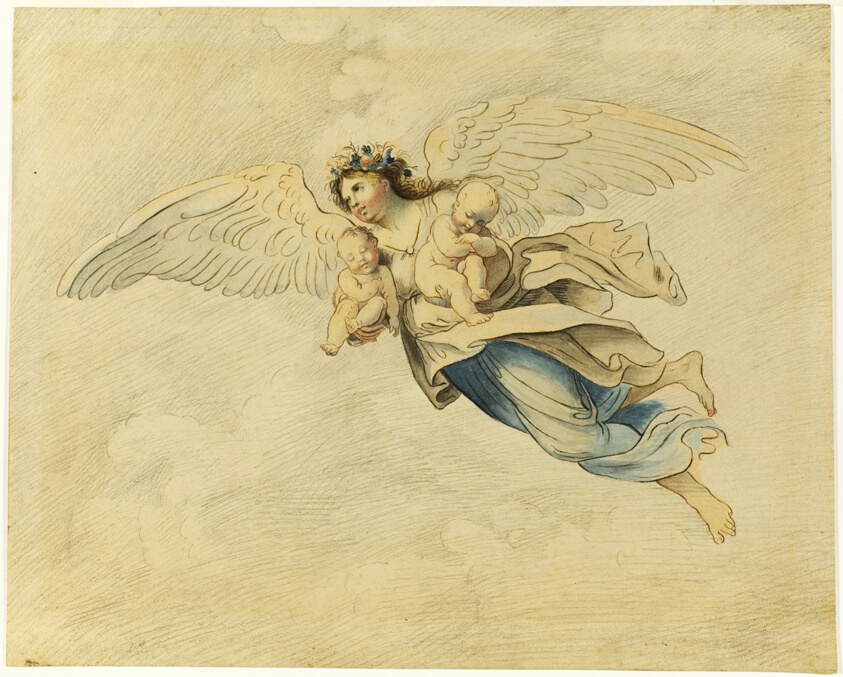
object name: Drawing and Watercolor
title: Night Carrying Sleep and Death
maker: after Domenichino; Italian, 1581-1641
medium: Pen and black and red ink, with brush and watercolor and graphite, on tan wove paper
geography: Italy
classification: watercolor; drawings (visual works); prints and drawing